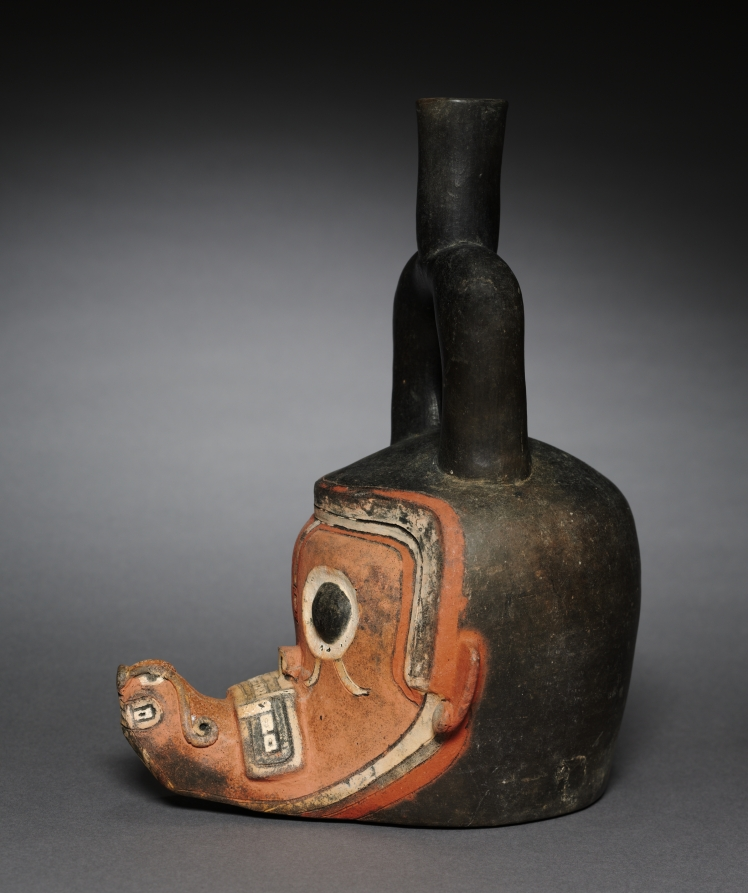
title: Deity-Head Vessel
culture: Peru, North Coast, Tembladera people, Early Horizon (900-400 BCE)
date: 900–400 BCE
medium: ceramic with pigment applied after firing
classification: Sculpture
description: This is a stirrup-spouted vessel shaped as the effigy of a deity head with bulging, circular eyes from which hang pendants. A fanged, bandlike mouth is arranged horizontally on top of a projecting chin that is tipped with a three-dimensional, zoomorphic head. A chin strap reaches between two modeled knobs that double as ear ornaments, and the underpart of the chin is ornamented with chevrons. The face is painted red, yellow, and white over the burnished gray-black surface of the ceramic.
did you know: The Tembladera style is one of several very early styles that developed on the northern desert coast of Peru.